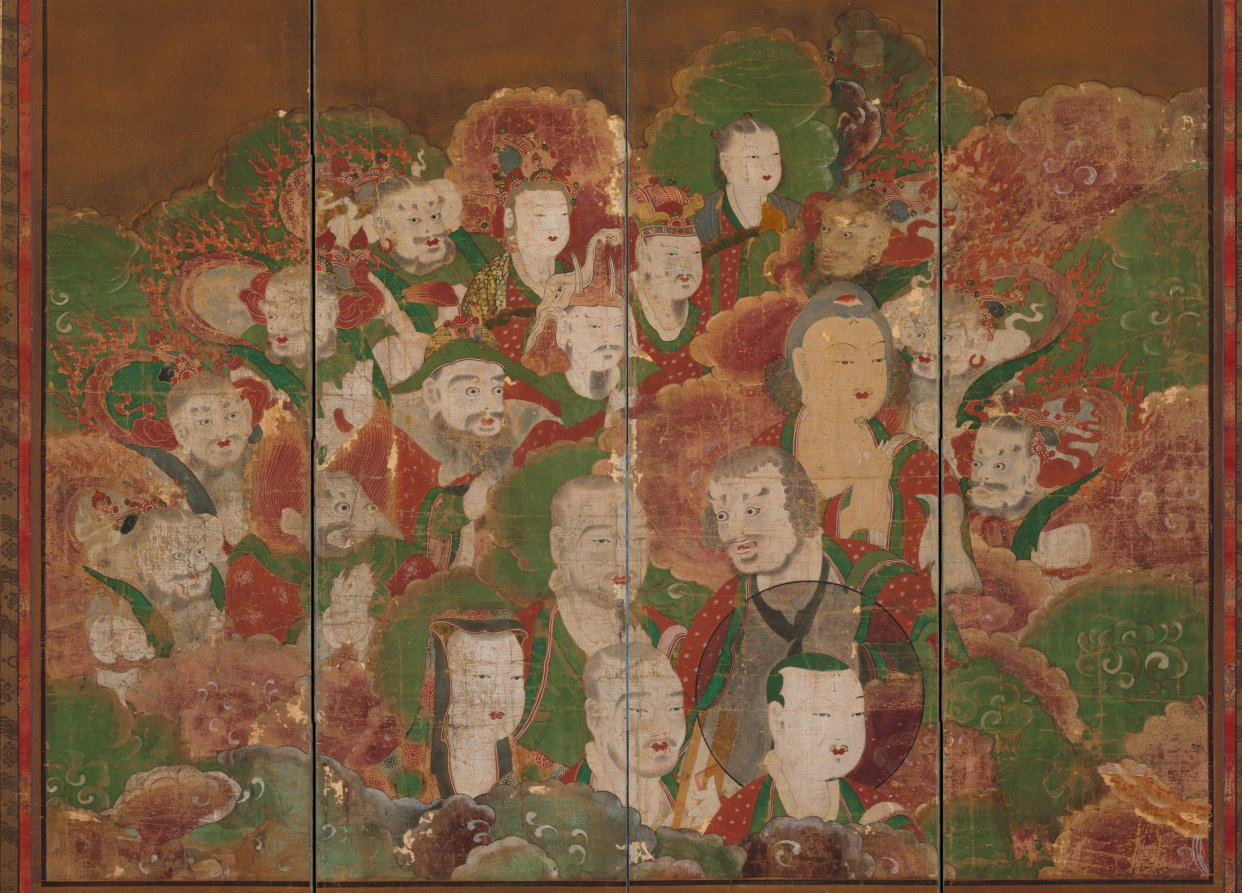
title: Buddhist Deities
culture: Korea, Joseon dynasty (1392–1910)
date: 1700s–1800s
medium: Four-panel folding screen; ink and color on silk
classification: Painting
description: This painting is a fragment of a much larger banner painting, now preserved by mounting on a four-panel continuous folding screen. On the back are Buddhist sutra pages, with text written in gold ink on indigo dyed paper.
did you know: This painting is a fragment of a much larger banner painting.